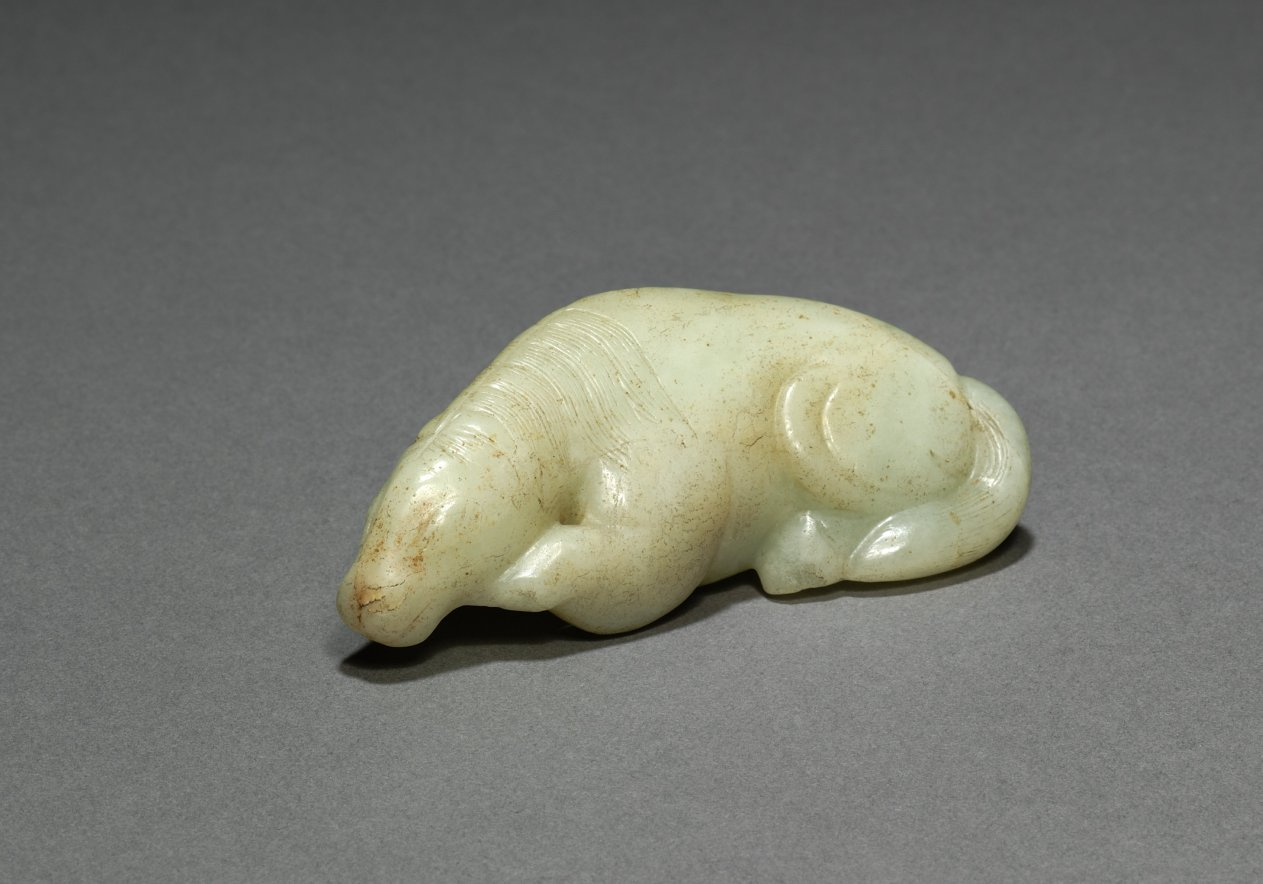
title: Recumbent Horse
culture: China, Song dynasty (960-1279)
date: 960–1279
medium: light gray-green jade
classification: Jade